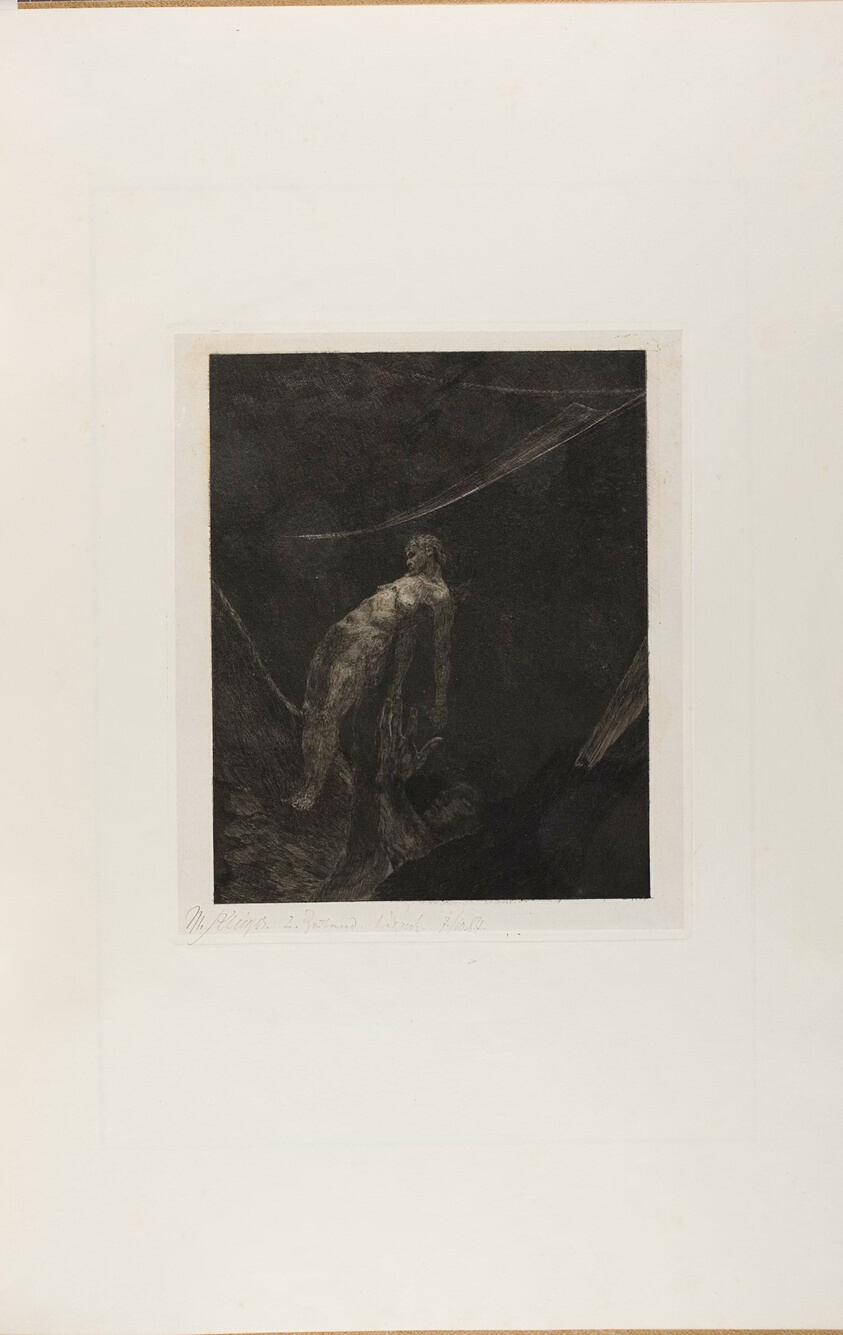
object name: Print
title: Back into Nothingness, plate fifteen from A Life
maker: Max Klinger (German, 1857-1920); printed by Otto Felsing (German, 19th century)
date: 1884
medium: Aquatint and etching on ivory China paper laid down on cream laid paper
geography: Germany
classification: aquatint; print; prints and drawing